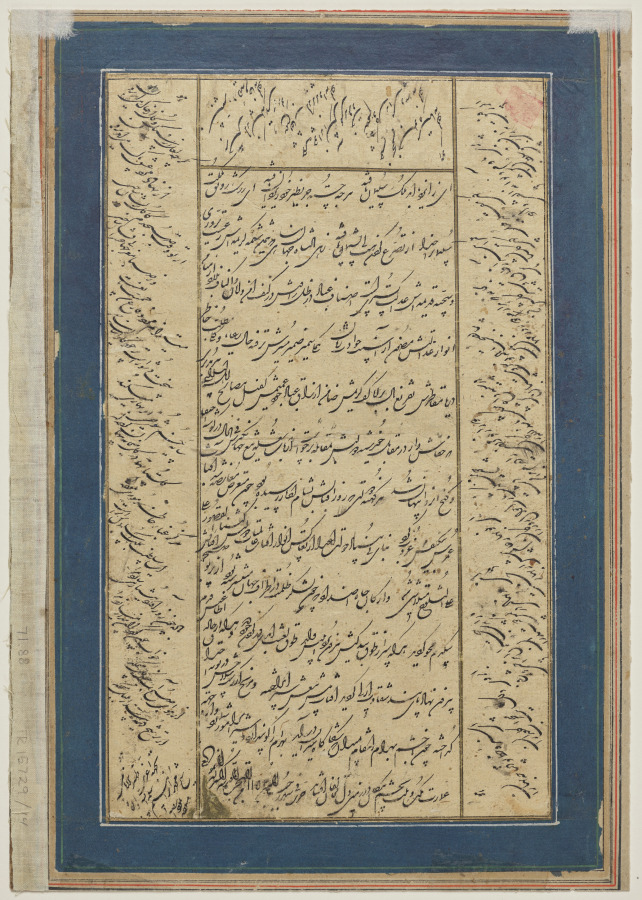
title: Grotesque Dancers Performing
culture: Mughal India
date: c. 1600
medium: gum tempera, ink, and gold on paper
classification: Painting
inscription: Unrelated later Persian text on recto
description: This scene from an unidentified manuscript depicts entertainers at the Mughal court. The dancers appear to be from the fringes of society, and they may be intended to depict tribal people or semihuman nature spirits. One is dark skinned with small elephant ears and red-rimmed eyes, wearing a white tiger-skin pelt. The female dancer wears a collar of leaves; the male figure on the right has horns, wears bells, and carries an animal-headed club that appears to be made of bone. An exuberant orchestra provides musical and vocal accompaniment below. While not an imperial production, this painting may reference the Mughal emperor Akbar’s practice of welcoming a wide range of people from all regions and traditions to his court, since he was interested in understanding their customs.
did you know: Akbar applied an aromatic paste under his arms, which stained his garment.